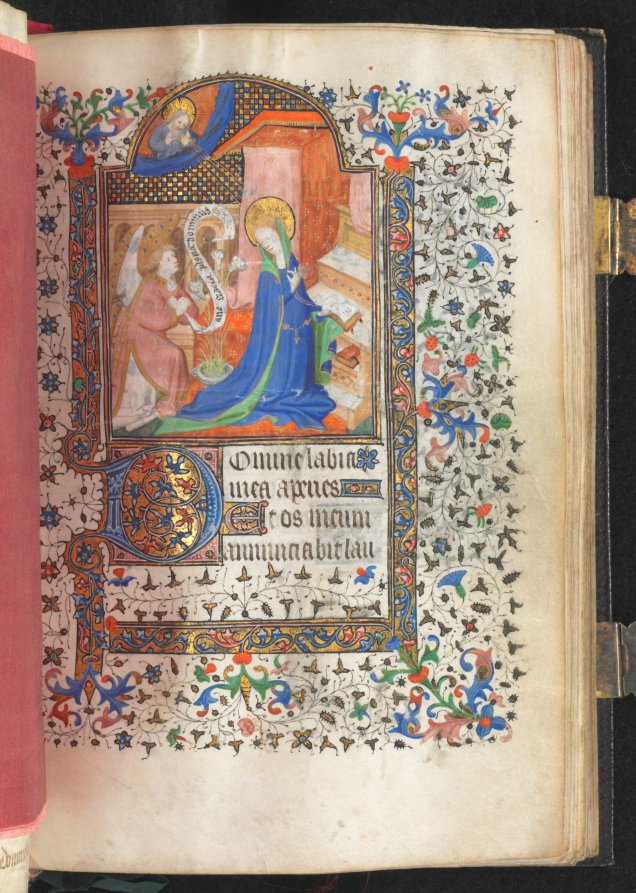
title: Book of Hours (Use of Paris): Fol. 37r, Annunciation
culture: France, Paris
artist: possibly studio or workshop of The Bedford Master (French, Paris, active c. 1405–30)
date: c. 1420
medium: ink, tempera, and gold on vellum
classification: Bound Volume